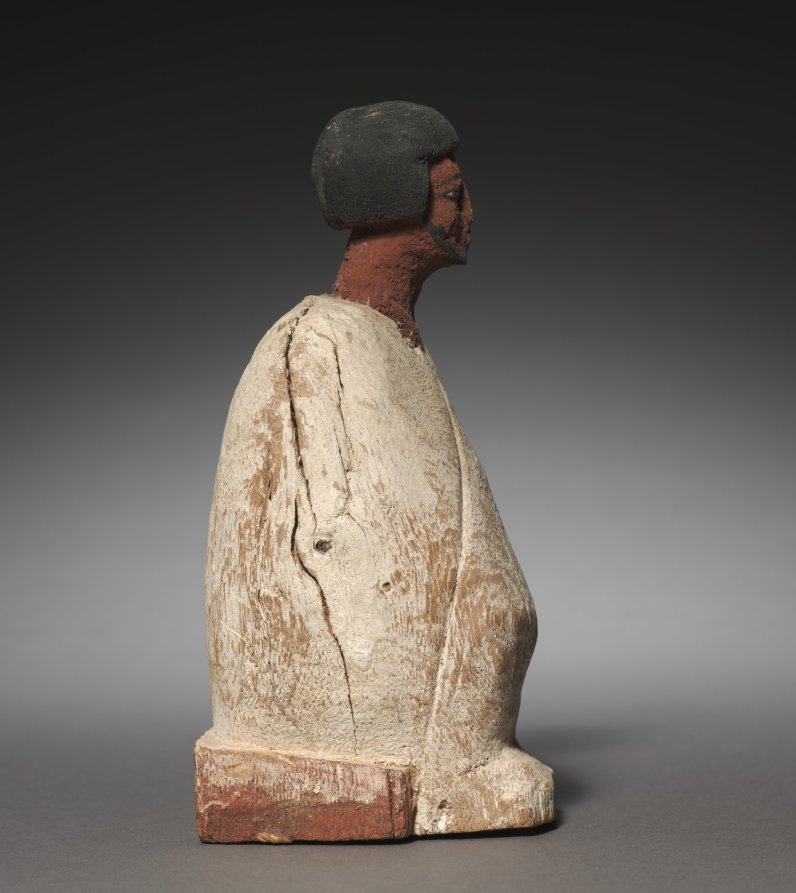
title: Model Boat Owner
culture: Egypt, Middle Kingdom (2040–1648 BCE), Dynasties 11–12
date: 2040–1648 BCE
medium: painted wood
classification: Funerary Equipment